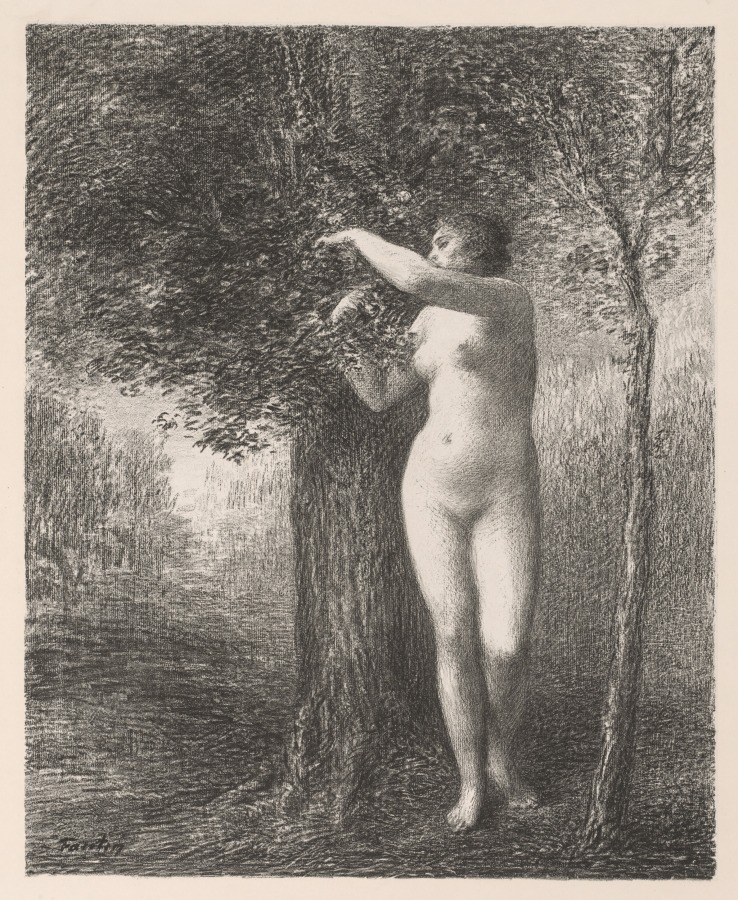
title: Eve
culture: France, 19th century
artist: Henri Fantin-Latour (French, 1836–1904)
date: 1896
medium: lithograph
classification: Print